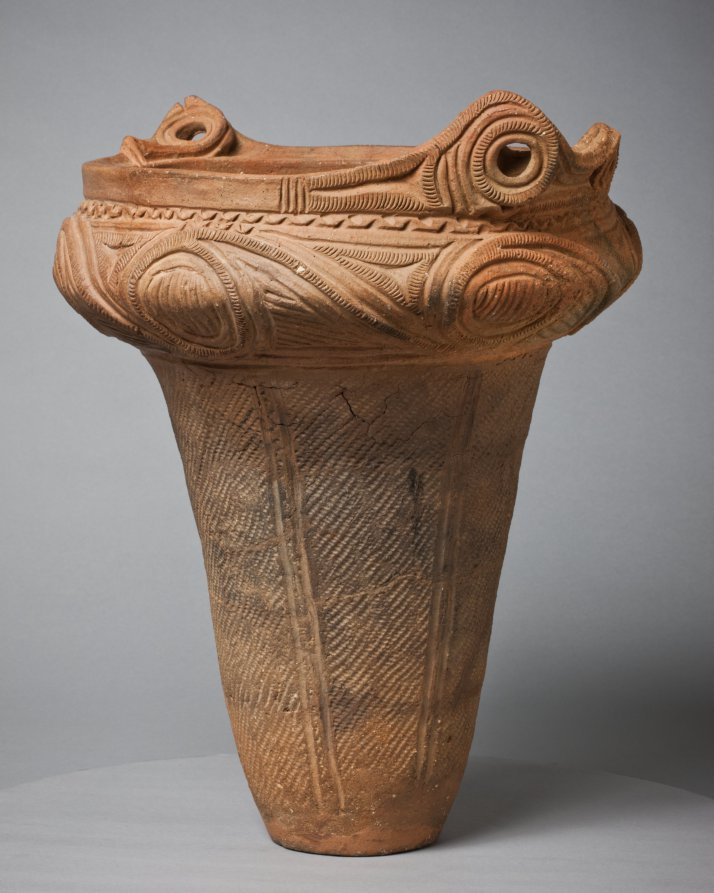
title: Urn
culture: Japan, Jōmon period (c. 10,500–300 BCE)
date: c. 2000 BCE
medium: earthenware, terracotta, impressed and incised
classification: Ceramic